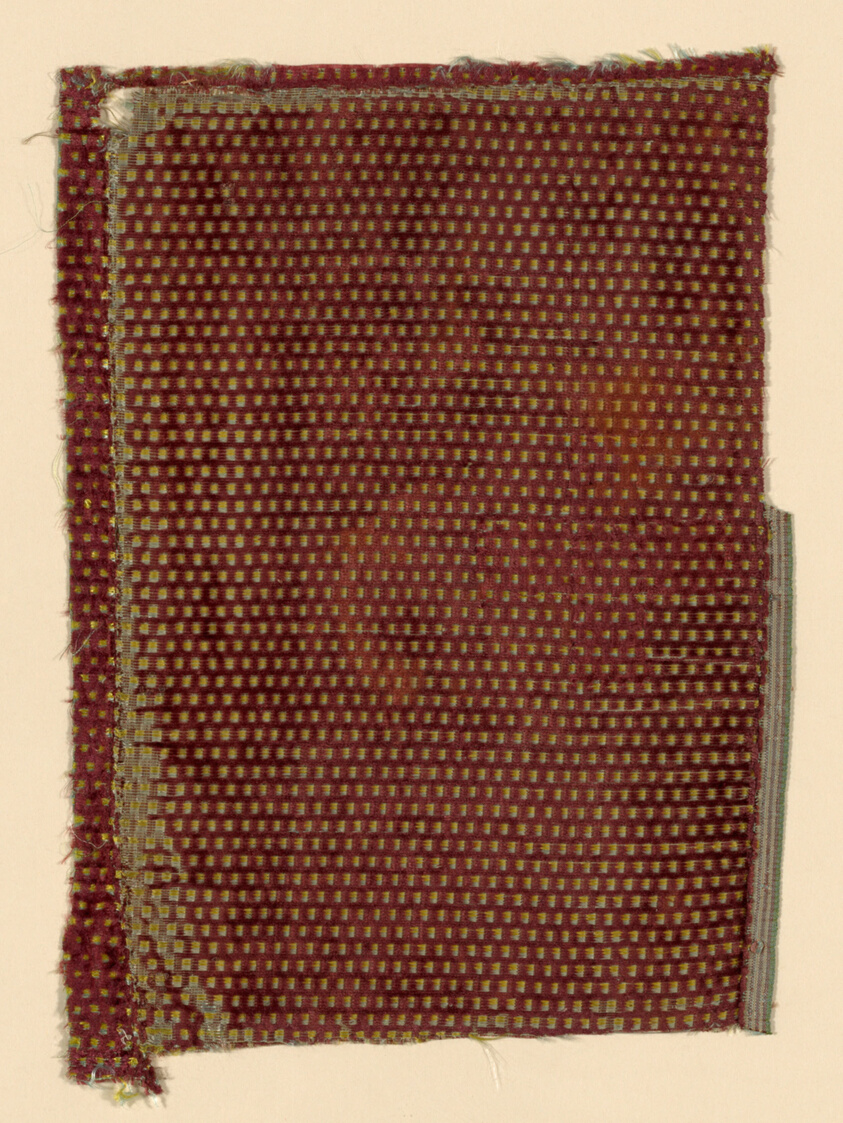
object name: Textile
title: Fragment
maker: Italy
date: 1775/1800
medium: Silk, cut, and voided velvet with additional patterning weft floats against plain weave foundation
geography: Italy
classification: textile; weaving - velvet